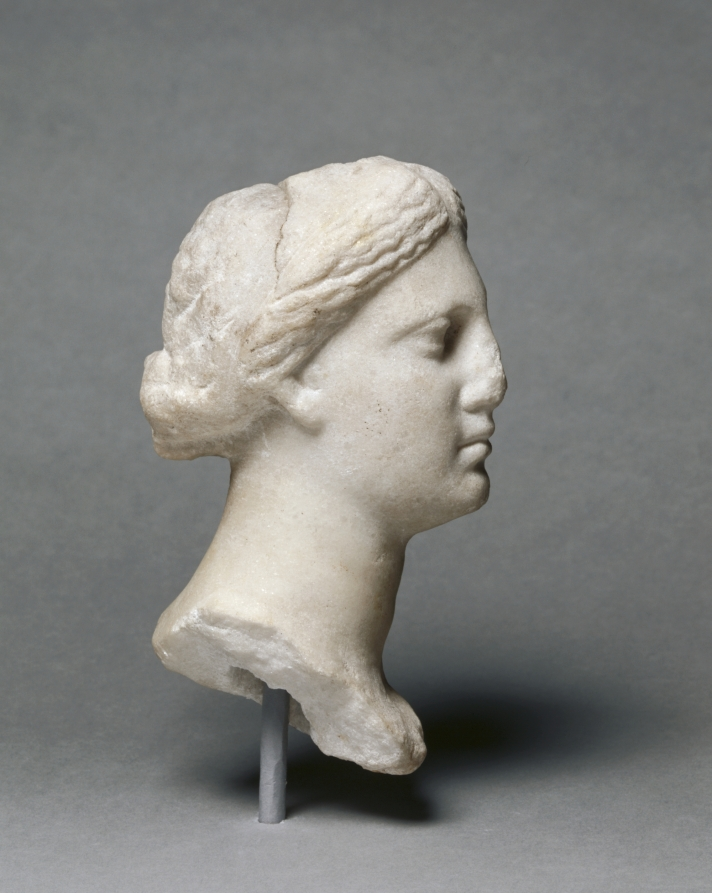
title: Head of a Woman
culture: Greece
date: 400–200 BCE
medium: marble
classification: Sculpture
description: This marble bust of a woman is rendered with the soft, delicate features typical of Greek sculpture of the late fourth and early third century BCE. Her features nearly disappear into the smooth landscape of her face, each curve fading softly into the next. Her hair is held away from her forehead in a series of tight braids pulled back to a bun, now mostly lost.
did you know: Though this hairstyle is often associated with sculptures of Aphrodite, it was also a popular style among mortal Greek women.